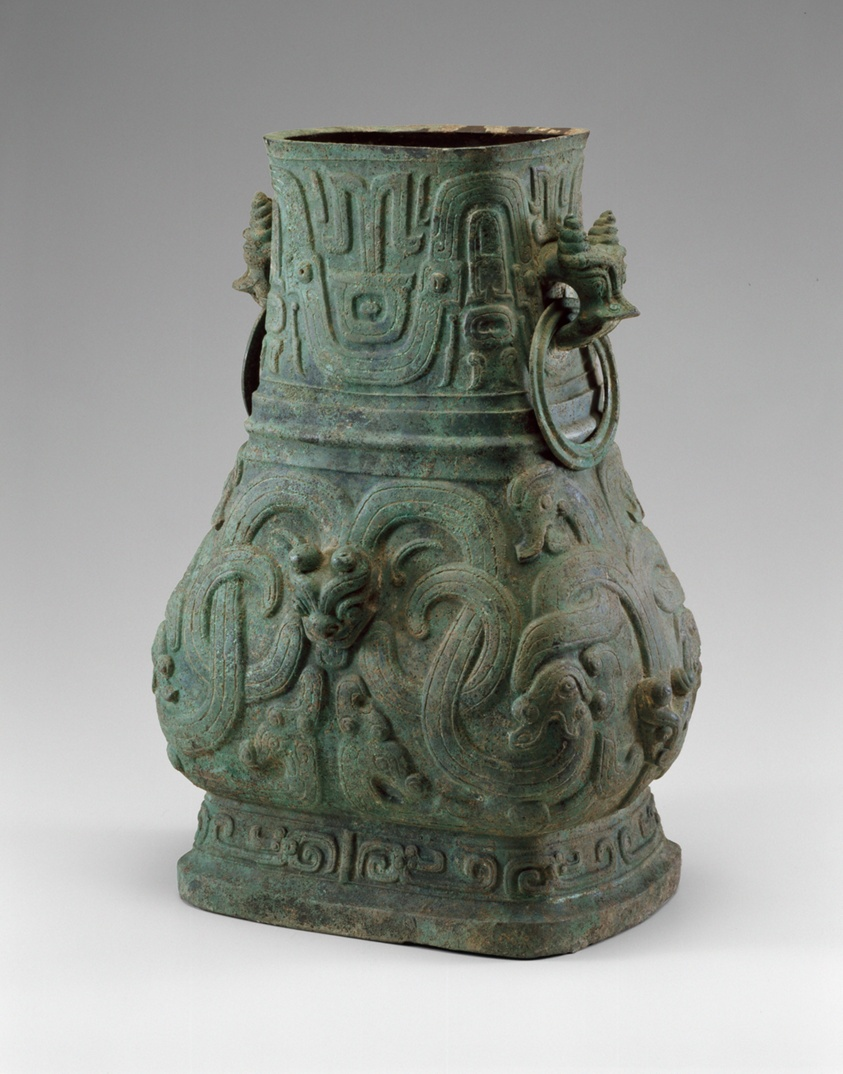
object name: Religious/Ritual Object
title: Pair of Jars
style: Chinese (culture or style)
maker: China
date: Western Zhou dynasty ( 1046–771 BC ), late 9th/8th century BC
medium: Bronze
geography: China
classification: vessel; vessel for serving drinks; bronze; metal; asian art; ritual objects